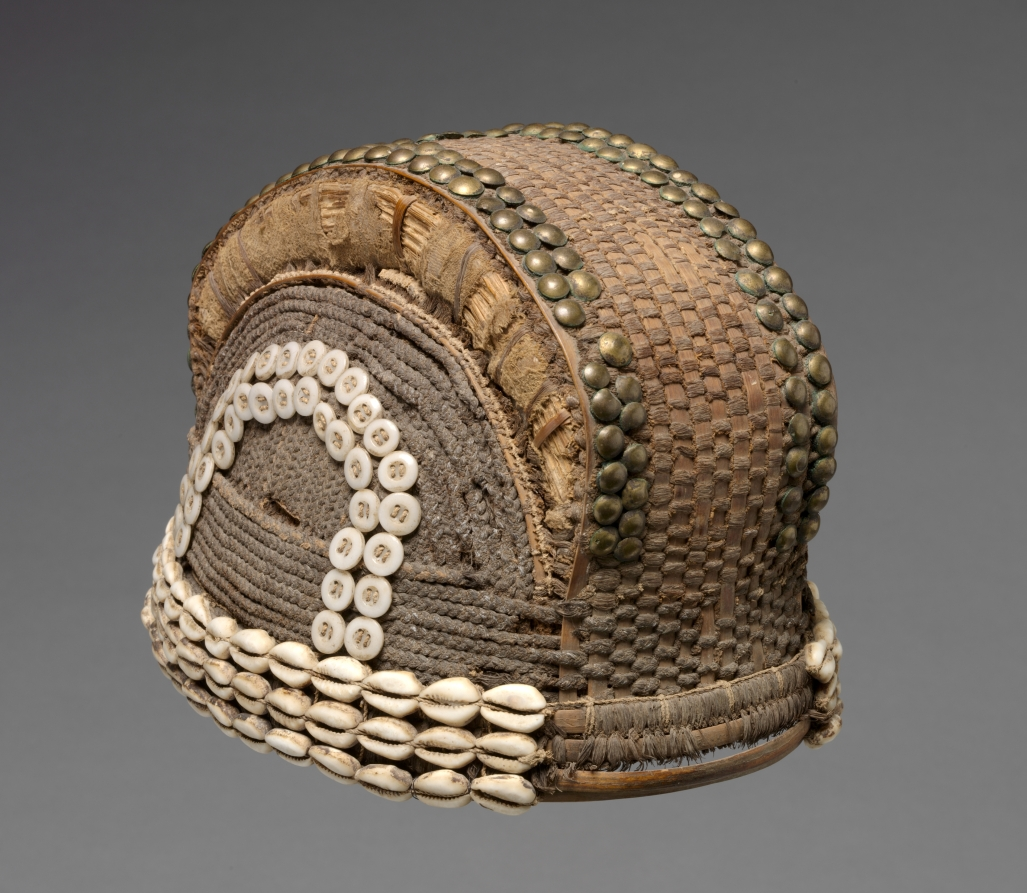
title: Headpiece (nlo-o-ngo)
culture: Africa, Central Africa, Gabon, Fang style, unknown maker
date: early 1900s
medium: Plant fibers, cloth, hair, cowrie shells, buttons, upholstery studs, and thread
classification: Garment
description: This headpiece (nlo-o-ngo) was made to look like a similarly shaped hairstyle. While the coiffure gained height from inserts tucked under the hair, here the underlying basket was woven into a central ridge. Plant fibers were woven or braided to mimic hairstyling techniques. Rarely removed, the hat gave the appearance of elaborately styled and decorated hair. Three rows of cowries around the band evoke a shell or bead headband, while the metal furniture tacks are the same as would have been inserted into the hair. Existing in many styles, men or women wore these wiglike headdresses to signify status, group identity, or social roles.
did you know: Sculptors depicted these characteristic headpieces and coiffures in figurative works that guarded the remains of ancestors.